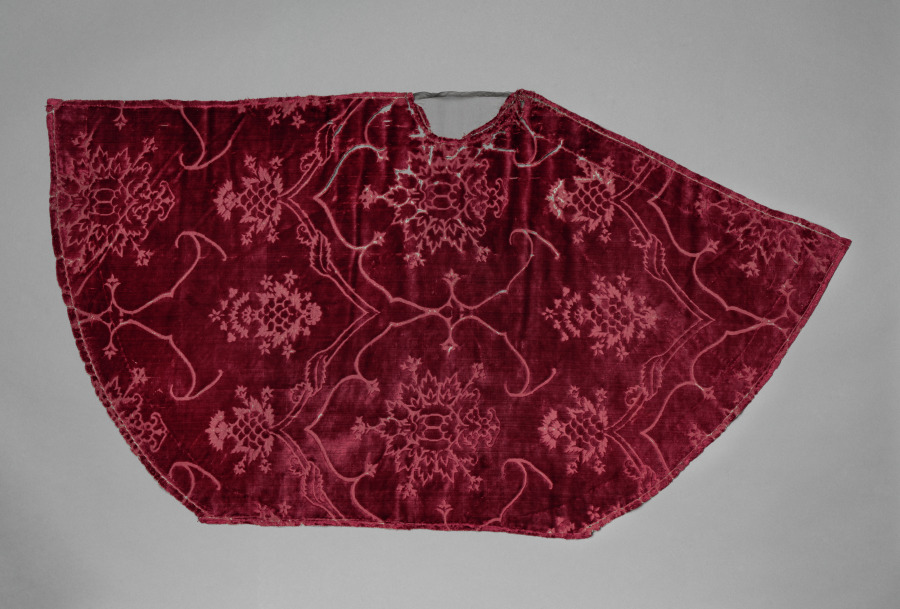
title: Pieces from Disassembled Cape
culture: Italy, 15th century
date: 1400s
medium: velvet (cut and voided); silk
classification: Velvet